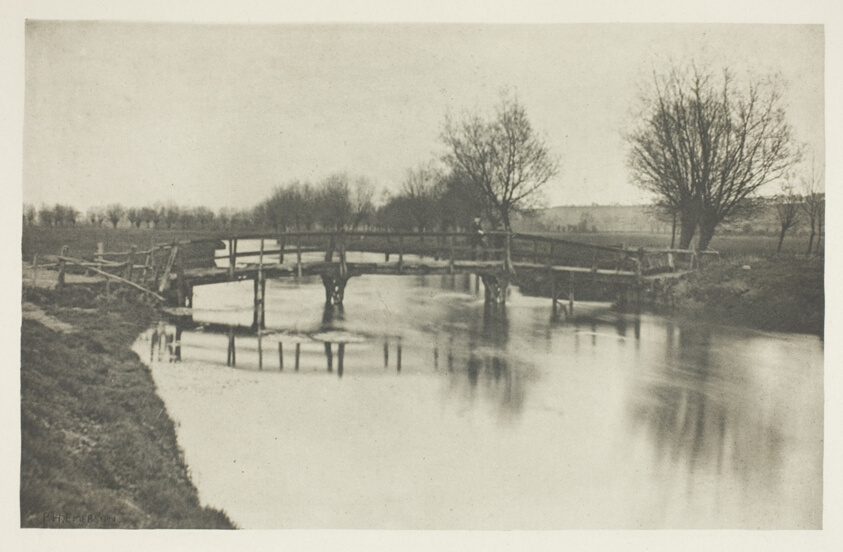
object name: Photograph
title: Footbridge Near Chestnut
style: 19th century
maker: Peter Henry Emerson (English, born Cuba, 1856–1936)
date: 1880s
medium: Photogravure, plate XXIII from the album "The Compleat Angler or the Contemplative Man's Recreation, Volume II" (1888)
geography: England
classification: photogravure; photomechanical process; photography; photograph